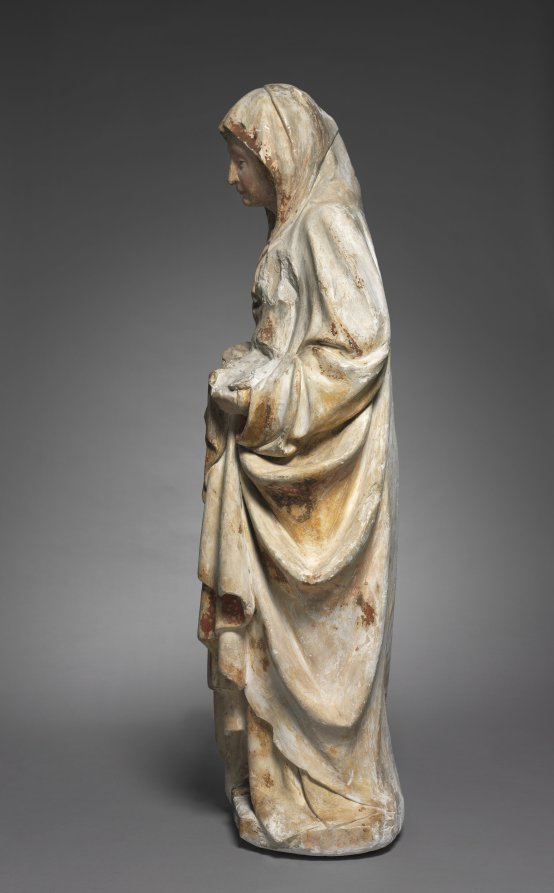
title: Standing Virgin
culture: Netherlands, active Dijon, 15th century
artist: follower of Claus de Werve (Netherlandish, 1380–1439)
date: c. 1440–1450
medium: painted and gilded limestone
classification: Sculpture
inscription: inscriptions on reverse.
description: This standing Virgin now lacks the child she once cradled in her left arm. The sculpture may have been damaged in the French Revolution by falling onto its face. It was carved from soft white limestone of a type known to be quarried at Asnières-lès-Dijon, near Champmol. The figure recalls many of the hallmarks of the style of Claus de Werve, a Netherlandish artist active at the court of Burgundy. The Virgin has a sweet, round face that is also smooth and fleshy, her eyelids droop pensively and she is engulfed in rich voluminous draperies that cascade in deep folds. This sculpture should be seen as a charming reflection of de Werve’s many Virgin and Child groups. It was probably carved by a follower closely acquainted with his style.